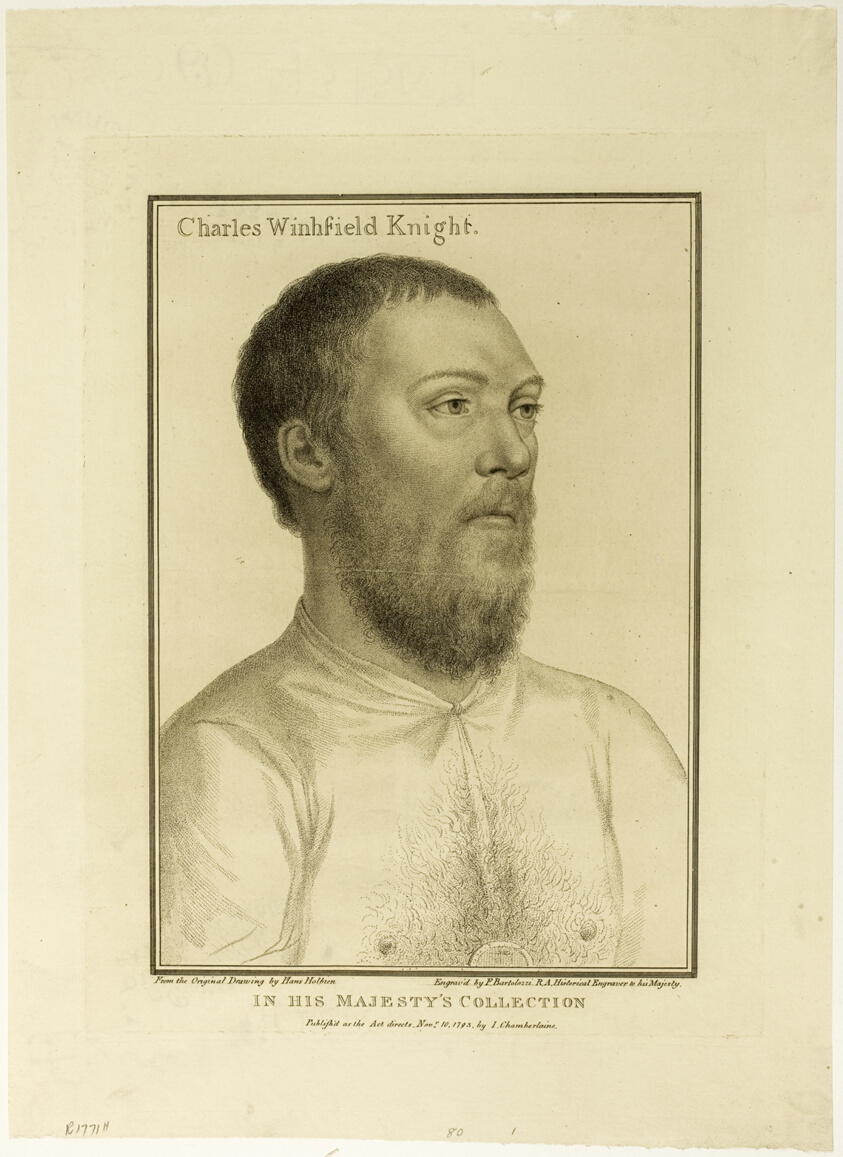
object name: Print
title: Charles Wingfield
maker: Francesco Bartolozzi (Italian, 1727-1815); after Hans Holbein the younger (German, 1497-1543)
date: November 10, 1793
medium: Stipple engraving on cream wove paper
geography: Italy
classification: engraving; print; prints and drawing